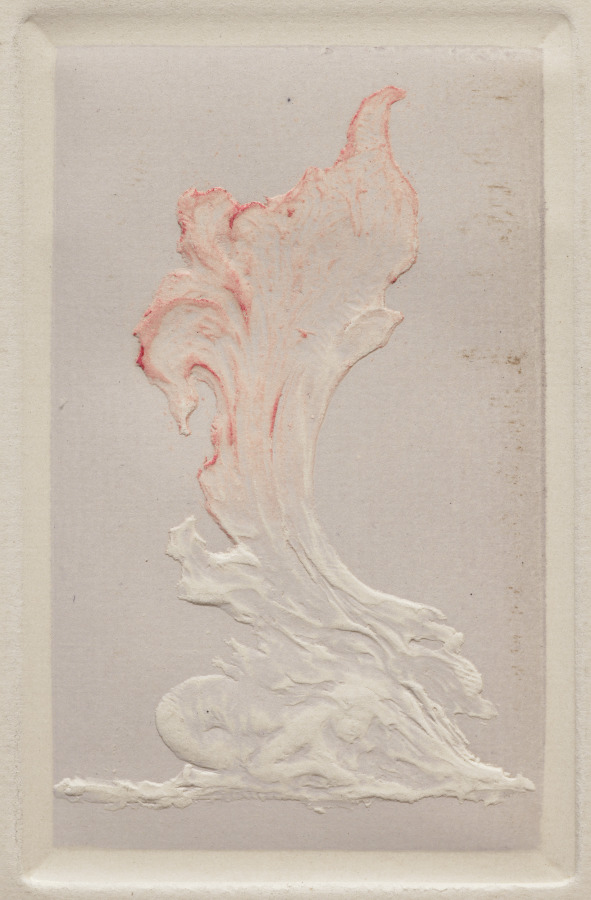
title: Dancing Woman in Kneeling Position Enveloped in Drapery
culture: France, early 20th Century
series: La Loïe Fuller, by Roger Marx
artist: Pierre Roche (French, 1855–1922)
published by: Les Cents Bibliophiles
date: 1904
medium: gypsograph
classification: Bound Volume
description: Although best known as a sculptor, Roche was a versatile and prolific artist who worked in many mediums. Loïe Fuller, the pioneer of modern dance who took Paris by storm in 1892, was one of his favorite subjects. He portrayed her in clay, bronze, marble, plaster, and in a series of gypsographs that illustrated an essay by the art critic Roger Marx. The book was described as "a precious monument to Loïe Fuller."